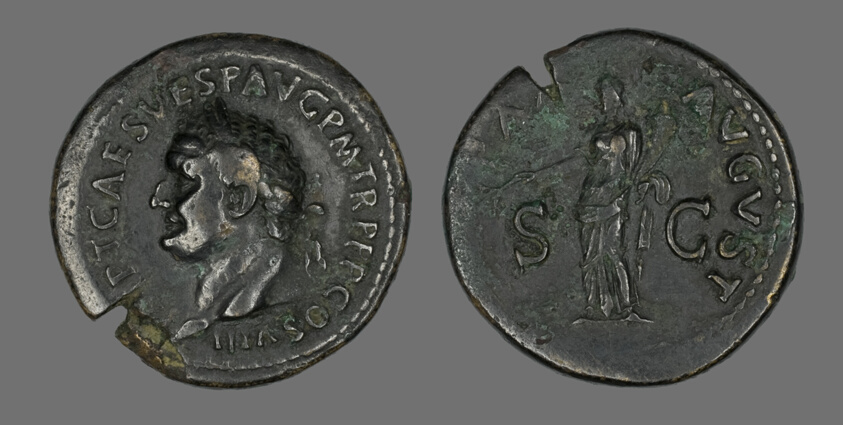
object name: Coin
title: Coin Portraying Emperor Vespasian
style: imperial (roman), ancient, roman (ancient, style or period)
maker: Roman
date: 76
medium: Bronze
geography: Roman Empire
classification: coin; ancient art